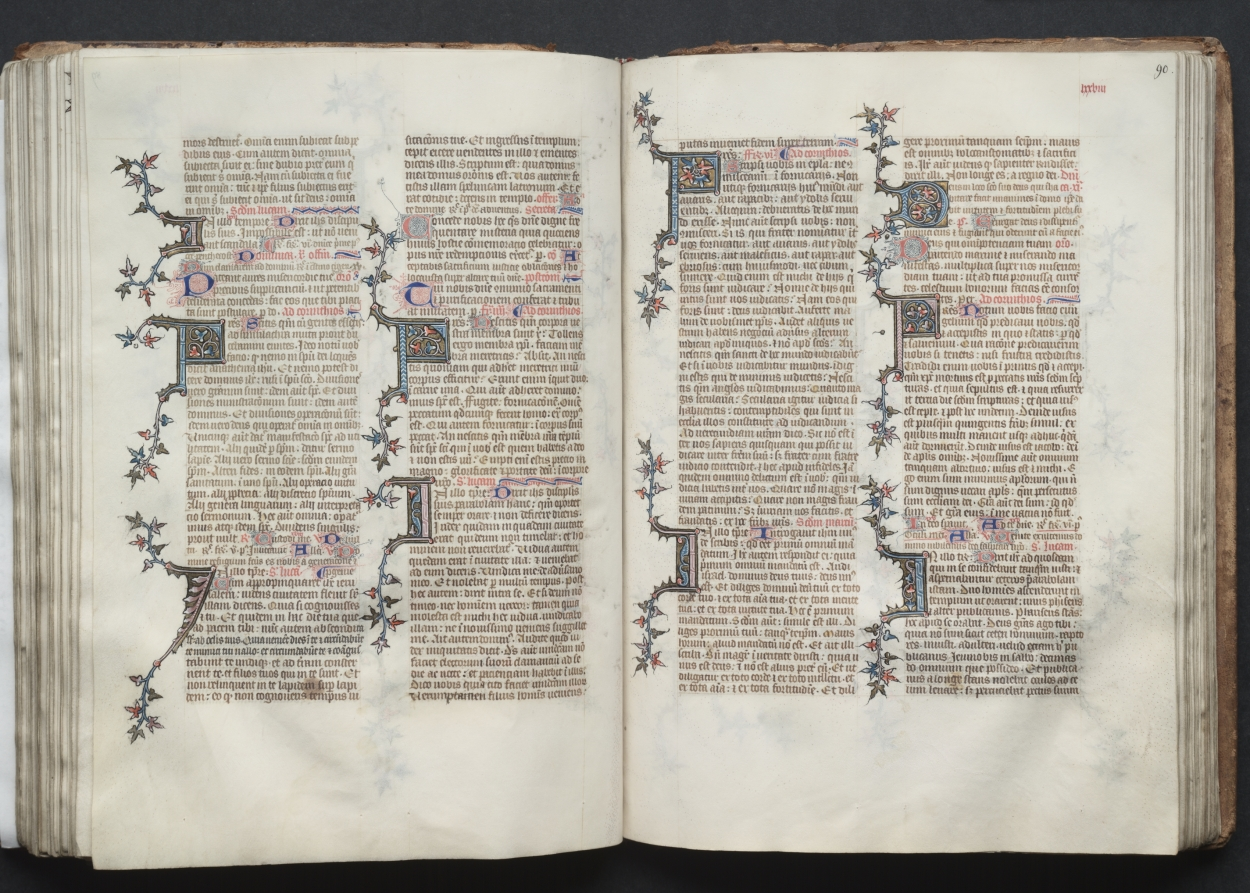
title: The Gotha Missal: Fol. 90r, Text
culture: France, Paris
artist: Master of the Boqueteaux (French)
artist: and Workshop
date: c. 1375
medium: ink, tempera, and gold on vellum; blind-tooled leather binding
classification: Bound Volume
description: The style and quality of this manuscript's decoration is typical of deluxe Parisian books made for aristocratic or royal patrons. Most of the book's decoration appears to be the work of the Master of the Boqueteaux, an artist active at the court of King Charles V (died 1380). His style was apparently shared by a number of book illuminators working in and around Paris. It is very possible that the Gotha Missal belonged to Charles V, but is not provable because the manuscript has no royal portraits and lacks a colophon. Given the book's magnificent decoration, however, it would seem that it was produced for a Valois prince, if not for the king himself. The manuscript receives its name from the German dukes of Gotha, its later owners.